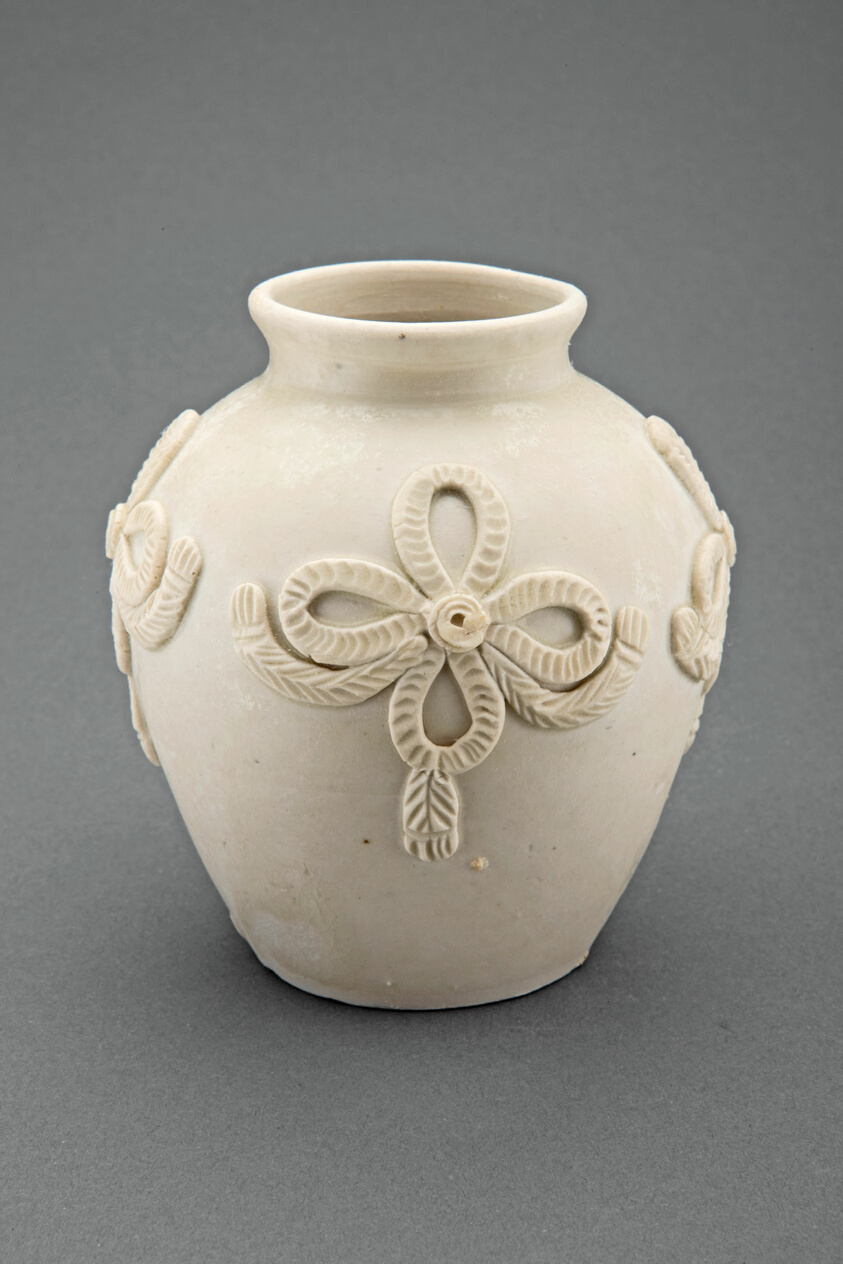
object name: Vessel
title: Ovoid Jar with Looped Bows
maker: China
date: Five Dynasties period (907–960) or Song dynasty (960–1279), c. 10th century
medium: Porcelain with underglaze applied decoration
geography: China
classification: vessel